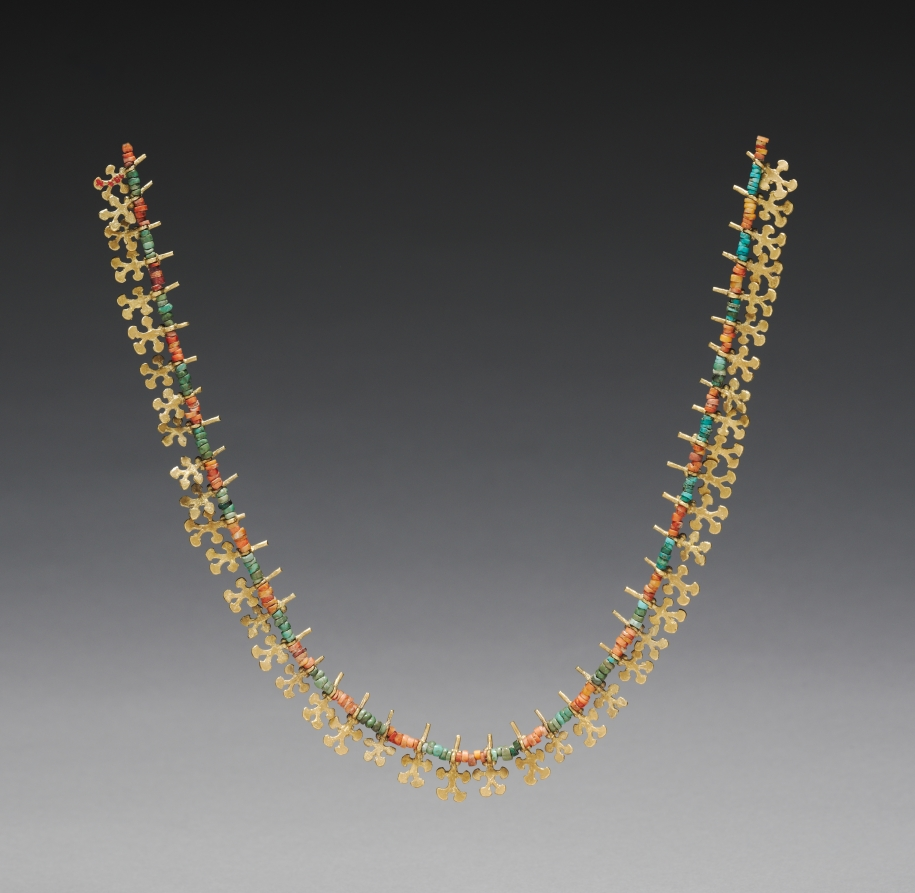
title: Necklace of Insect(?) Beads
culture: Colombia, Malagana region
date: 300 BCE–300 CE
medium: cast gold, turquoise, shell (modern stringing)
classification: Jewelry